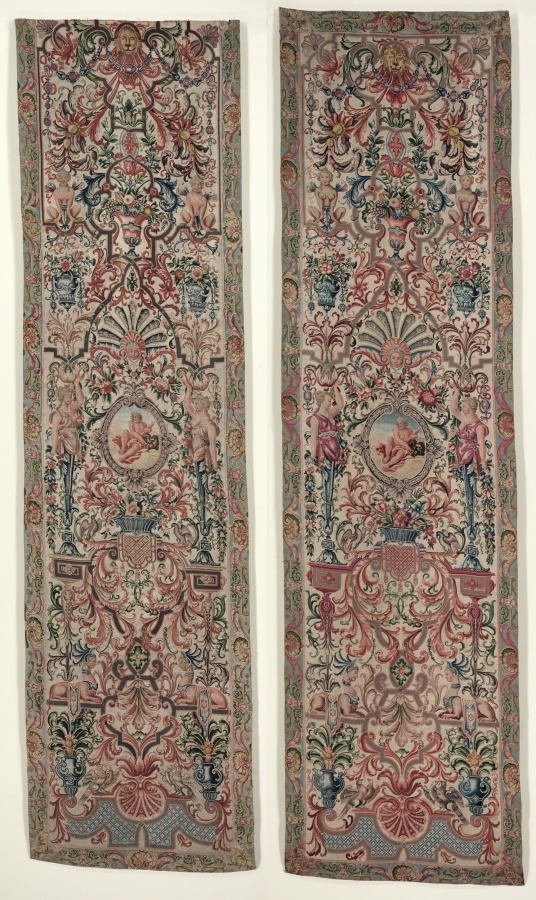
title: Pair of Needlework Bed Hangings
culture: France, late 17th century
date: c. 1690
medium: petit point embroidery; silk and wool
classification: Embroidery